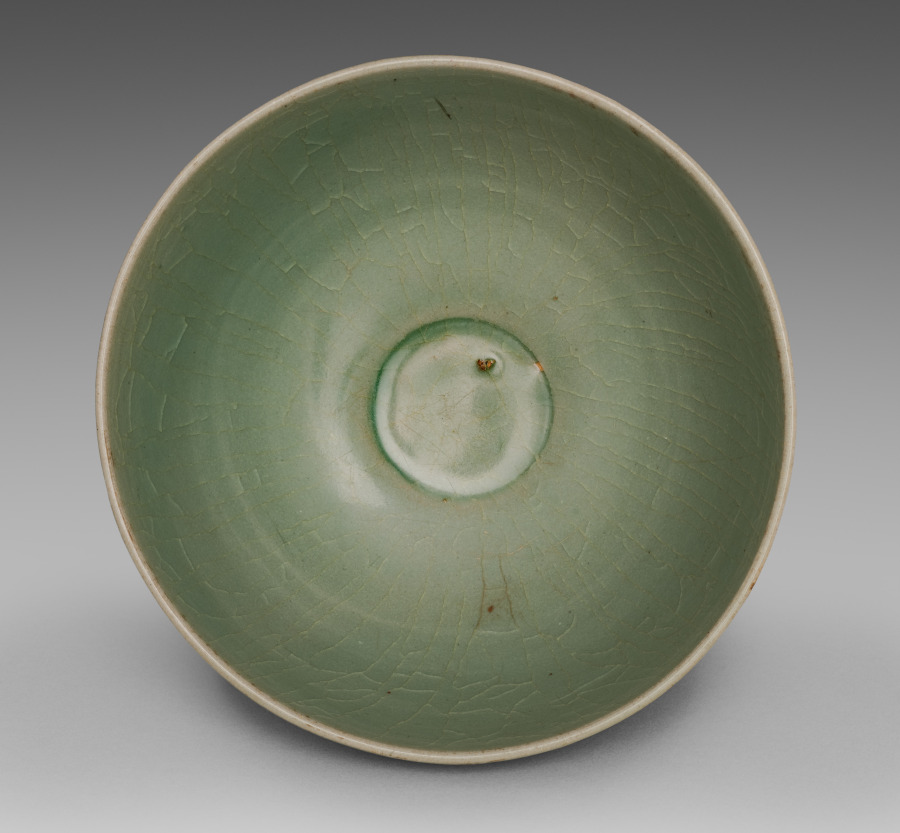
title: Celadon Bowl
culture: Korea, Goryeo dynasty (918–1392)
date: 1200s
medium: Celadon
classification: Ceramic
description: As early as the seventh century, the practice of drinking tea and wine became an important part of elite leisure culture in Korea. A wide bowl like this example was especially suitable for drinking powdered tea shaved from a compressed tea cake, the most commonly enjoyed type during the Goryeo period.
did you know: Crackling occurs when the glaze contracts more rapidly than the clay body during the firing process. In the context of celadon bowls, this phenomenon is not regarded as a flaw but rather as a highly valued aesthetic feature—one that evokes a sense of age.